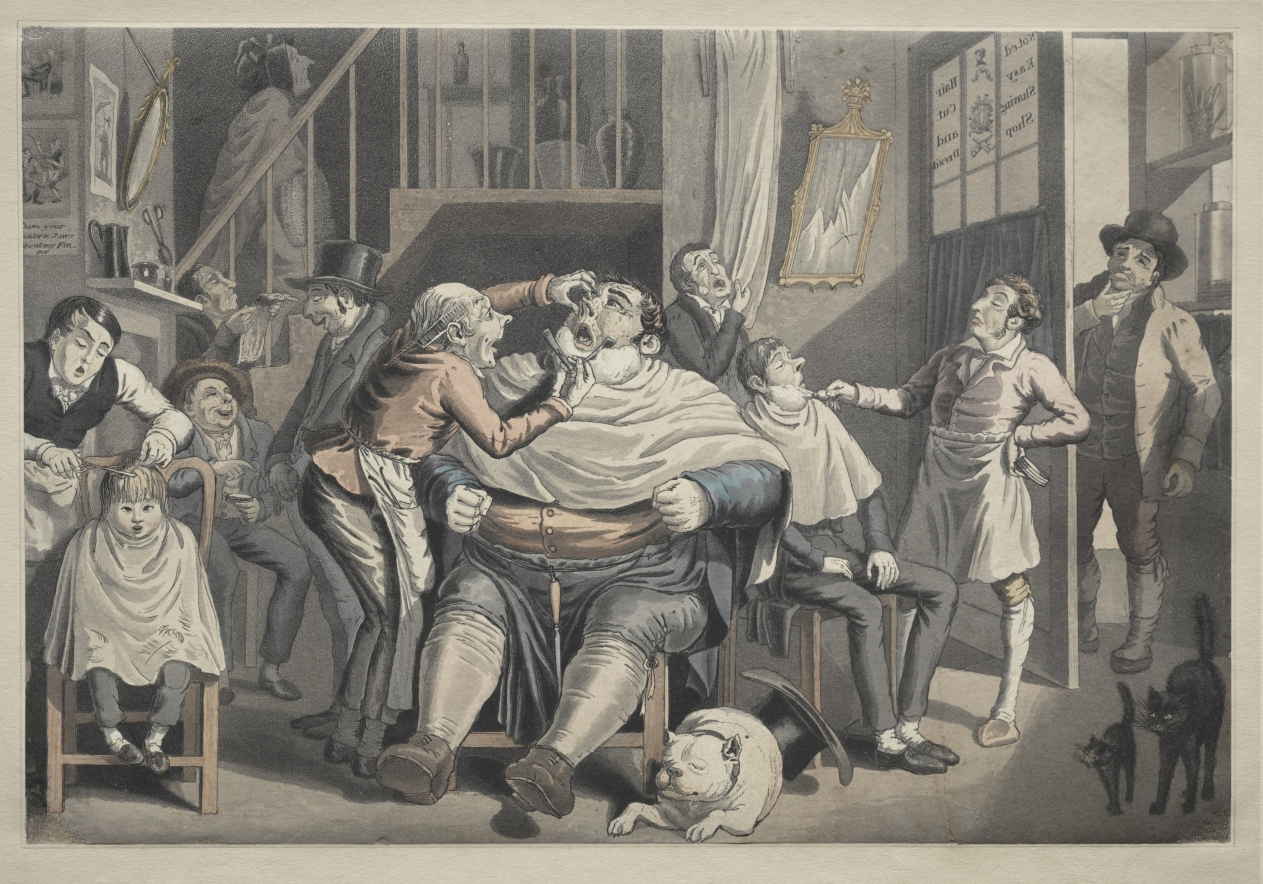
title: A Barber's Shop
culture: England, 18th century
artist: after Thomas Rowlandson (British, 1756–1827)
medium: etching and aquatint, hand colored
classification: Print